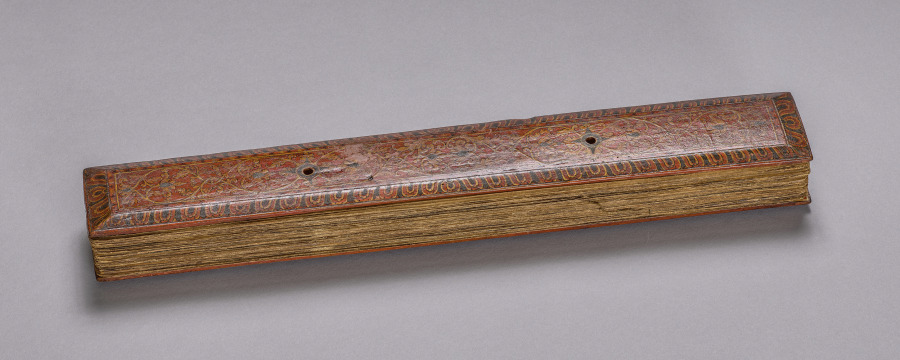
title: Buddhist Manuscript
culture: Sri Lanka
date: c. 1700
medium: Covers: Gum tempera on wood; pages: charcoal on palm leaves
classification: Manuscript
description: Palm leaf material is still used for manuscripts in Sri Lanka. The palm leaves are prepared first by boiling them, drying them in the sun, and then rubbing them with oils. Scribes then use a metal stylus to incise the text. Then charcoal powder is wiped across the pages, filling in only the inscribed lines.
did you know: The text is written in Sinhalese script.